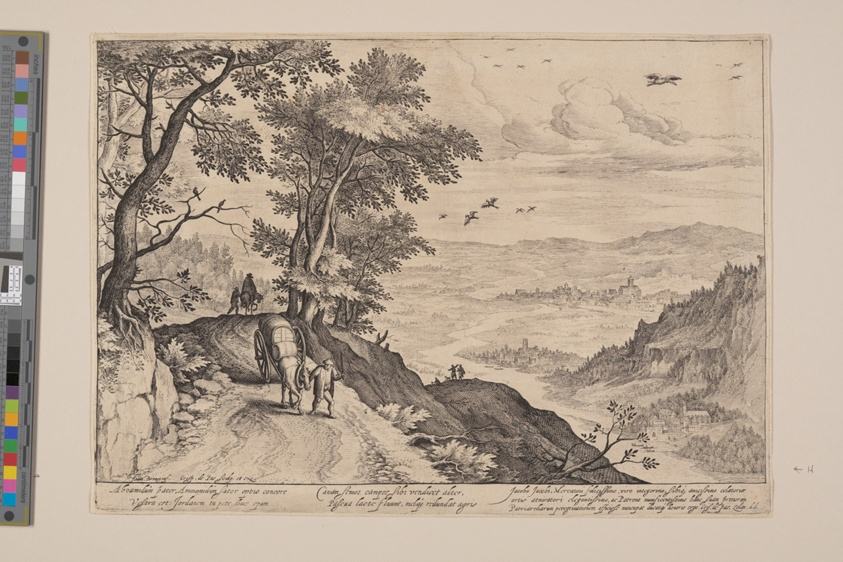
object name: Print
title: Vast Landscape with Coach Driver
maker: Crispijn van de Passe I (Dutch, c. 1565–1637); after Jan Brueghel (Flemish, 1564-1635)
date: c. 1600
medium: Engraving on ivory laid paper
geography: Netherlands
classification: print; paper; prints and drawing; engraving